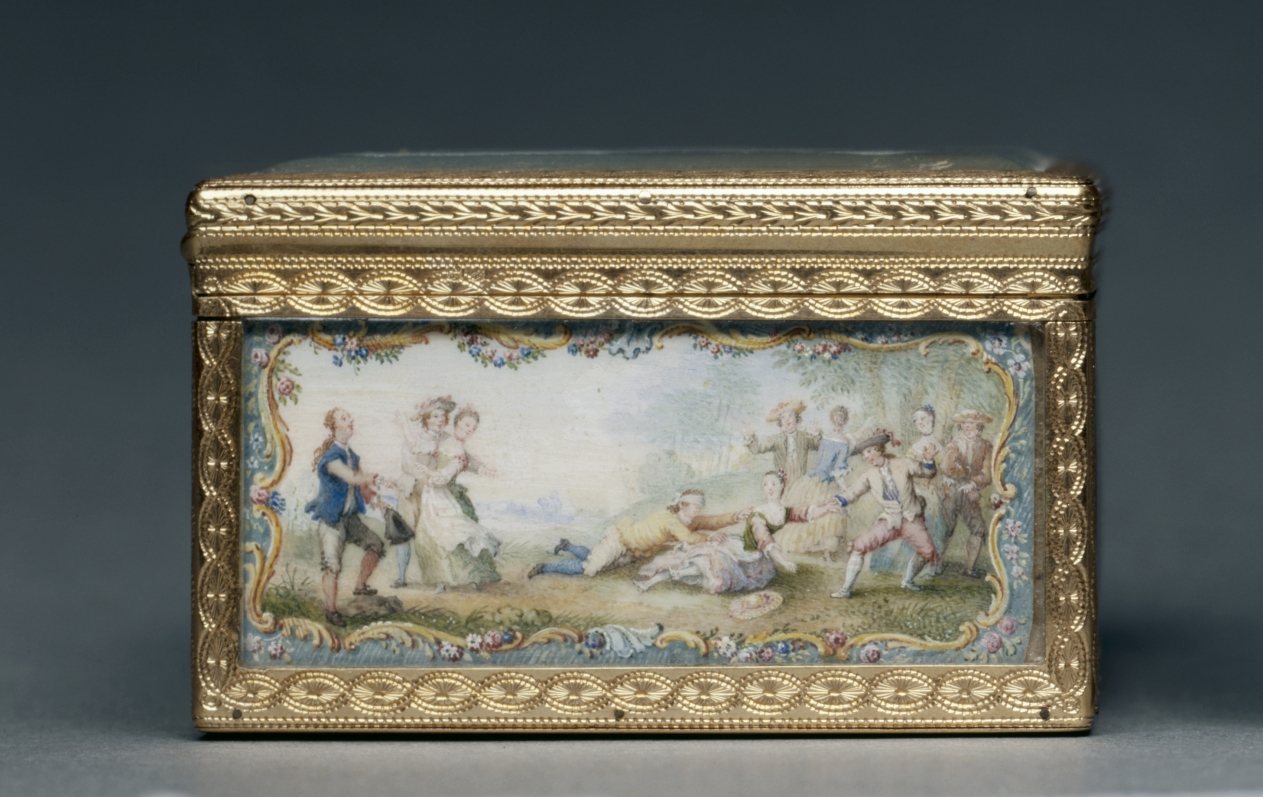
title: Snuff Box (Tabatière)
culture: France, 18th century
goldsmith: Jean Ducrollay (French, 1709–1787)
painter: Louis Nicolas van Blarenberghe (French, 1716–1794)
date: 1753–54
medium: gold and glass with miniatures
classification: Metalwork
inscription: [Maker's mark of Jean Ducrollay, master goldsmith in 1734, inside cover; bottom; right side]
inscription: [Charge mark of Julien Berthe, Paris, 1750-1756, inside cover; bottom; right side]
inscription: [Discharge mark of Julien Berthe, Paris, 1750-1756, on bezel]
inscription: [Inscribed on miniature, front side]: "V.[an] Blarenberghe/1753"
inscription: [Warden's mark for Paris, 1763-1754, inside cover; bottom; right side]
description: In 18th-century France ornately enameled boxes that held snuff—powdered tobacco—became a popular accessory in the French court. This object’s rectangular shape differs from early work attributed to Jean Ducrollay. Though the light colors, floral borders, and depictions of lively outdoor recreation are representative of earlier rococo imagery, the rectangular shape and simple frieze make it a primary example of rising neoclassicism.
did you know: The Ducrollay family was one of the most sought-after Parisian goldsmith workshops under the reign of French King Louis XV.